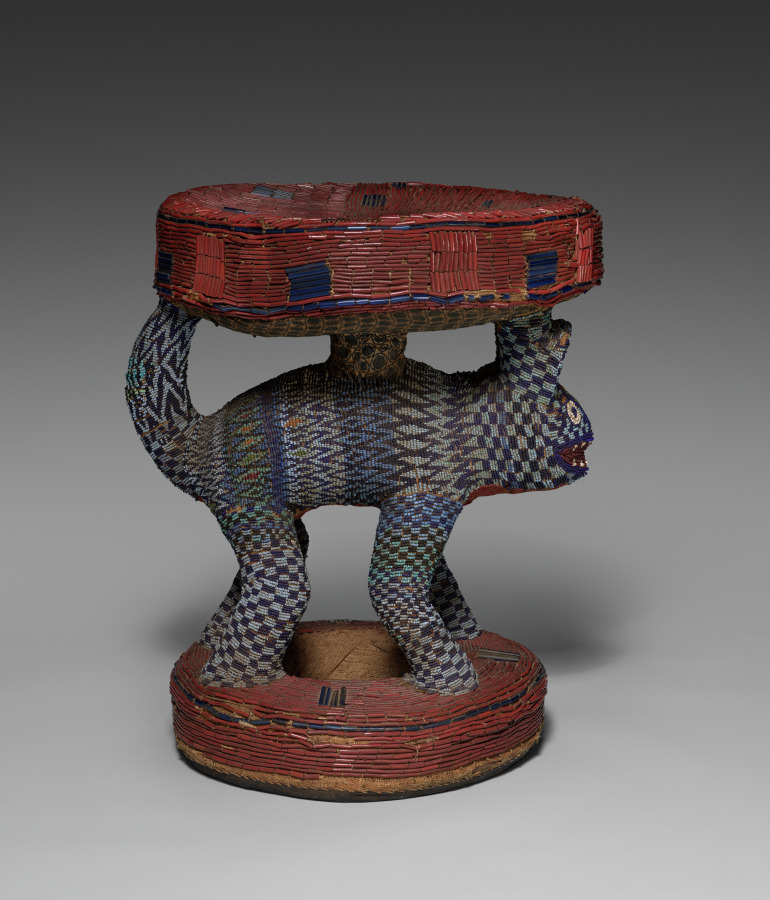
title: Prestige stool (Kuo fo)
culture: Africa, Central Africa, Cameroon, Bandjoun Kingdom, Bamileke makers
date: possibly 1800s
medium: Wood, cotton, plant fiber, glass beads, and indigo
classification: Furniture and woodwork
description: Bead-covered wooden stools and thrones are one of the most prevalent art forms among the various kingdoms and chiefdoms in the Cameroon Grassfields region. This example, once part of the royal treasury, belongs in the category of "travel stools," usually used in conjunction with more private, minor ceremonies and rituals at the palace. The leopard imagery confirms the object’s royal status. It alludes to the belief that the king could temporarily transform himself into this feared predator.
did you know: The beads on this stool were sewn on by hand. Look underneath the stool, however, and you can see commercially made printed fabric.